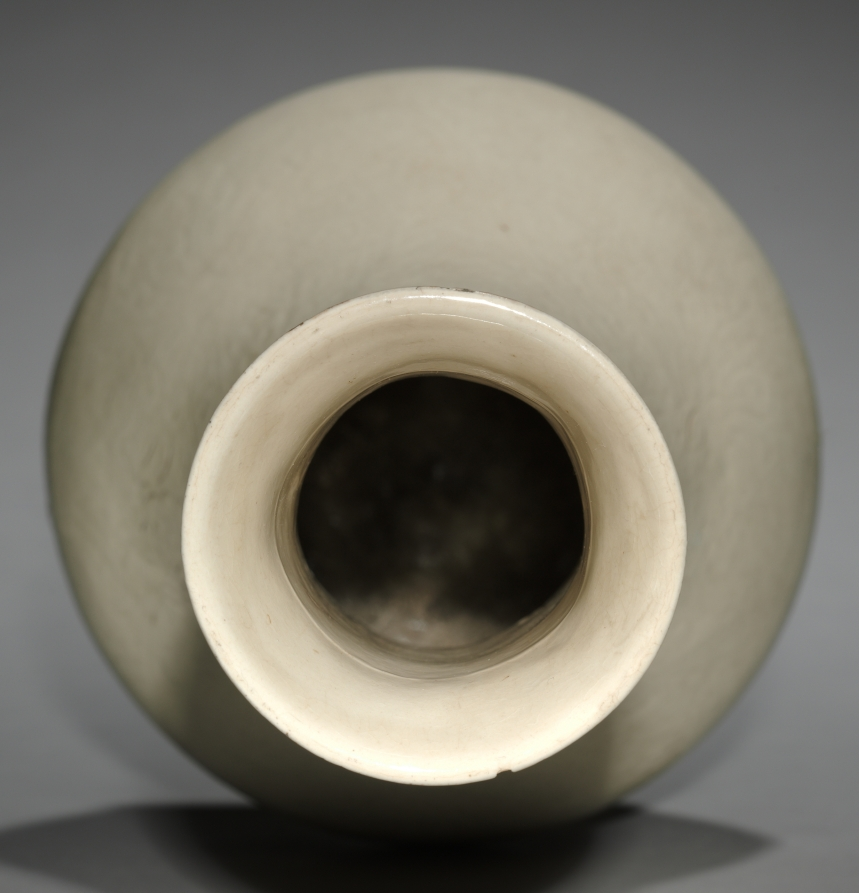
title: Vase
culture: China, Ming dynasty (1368–1644)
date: 1368–1644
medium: porcelain, Ding ware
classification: Ceramic